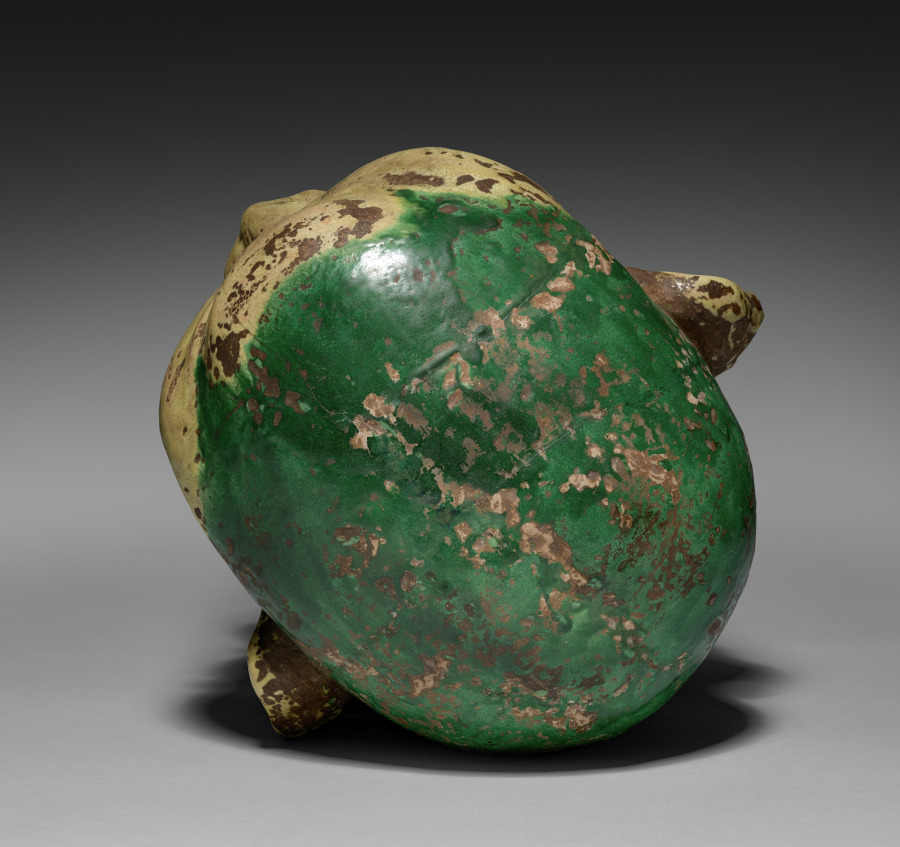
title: Head of a Lohan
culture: China, Ming dynasty (1368–1644)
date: 1368–1644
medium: earthenware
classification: Sculpture